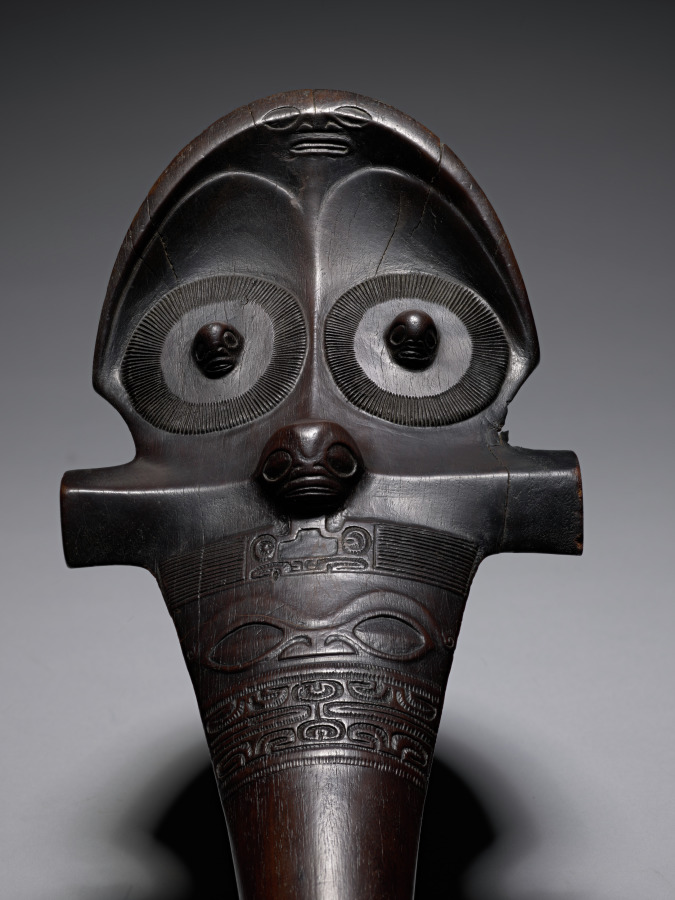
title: War Club ('U'u)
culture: Polynesia, Marquesas Islands, early 19th Century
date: early 1800s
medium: stained ironwood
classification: Sculpture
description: The head of this war club is carved as an abstract face, with small additional faces appearing at the eyes, nose, and forehead. Low-relief patterns encircle the club's neck. Fashioned from dense-grained ironwood (casuarina) or toa wood, the club is quite heavy. Like stilt footrests, war clubs were carved by expert artists (tahuna) and cured in the mud of a taro patch. The glossy finish is the result of regular rubbing and polishing with scented coconut oil. Similar war clubs were seen and recorded by the crew of Captain Cook's second voyage to the South Seas in 1772-75.